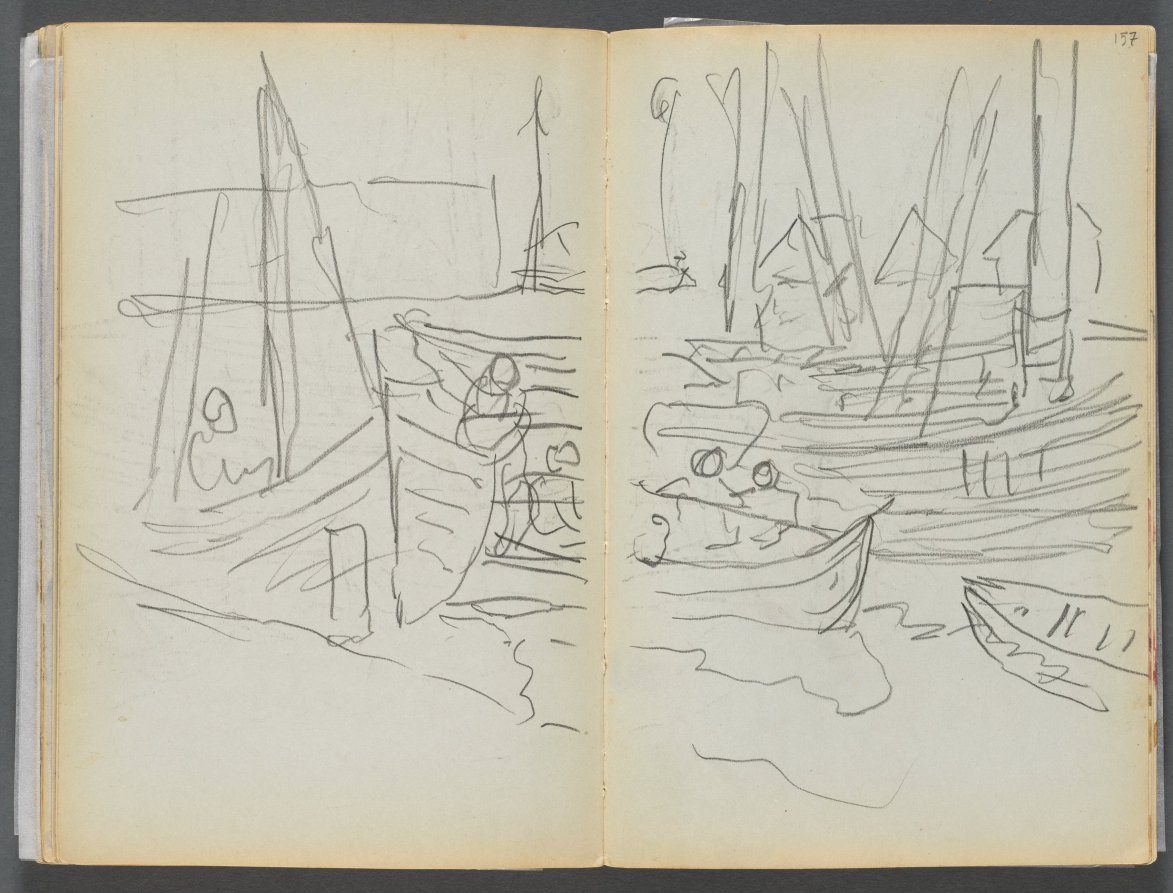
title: Sketchbook- The Granite Shore Hotel, Rockport, page 156 &157: Boats in Harbor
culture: America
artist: Maurice Prendergast (American, born Newfoundland [now Canada], 1858–1924)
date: 1905–10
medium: graphite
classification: Bound Volume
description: This sketchbook contains 72 pages of pencil drawings and 9 watercolors of Cape Ann. On the inside of the cover Prendergast wrote the address of the Granite Shore Hotel in Rockport, Massachusetts.